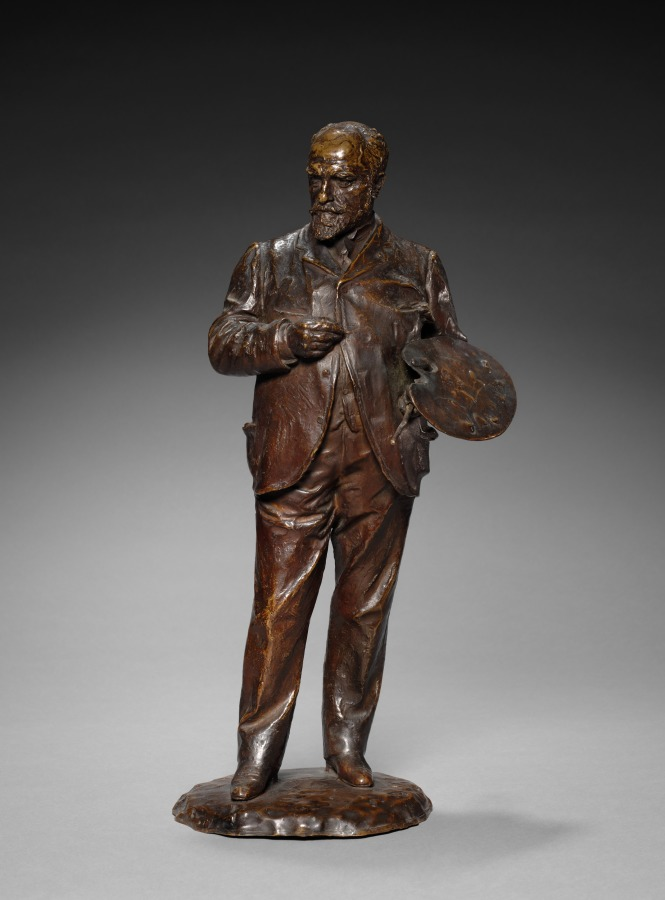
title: Standing Figure of Léon Bonnat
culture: France, 20th century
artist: Denys Pierre Puech (French, 1854–1942)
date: 1903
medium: bronze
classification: Sculpture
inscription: Signed and dated: "1903"; inscribed: "au maitre L. Bonnat"